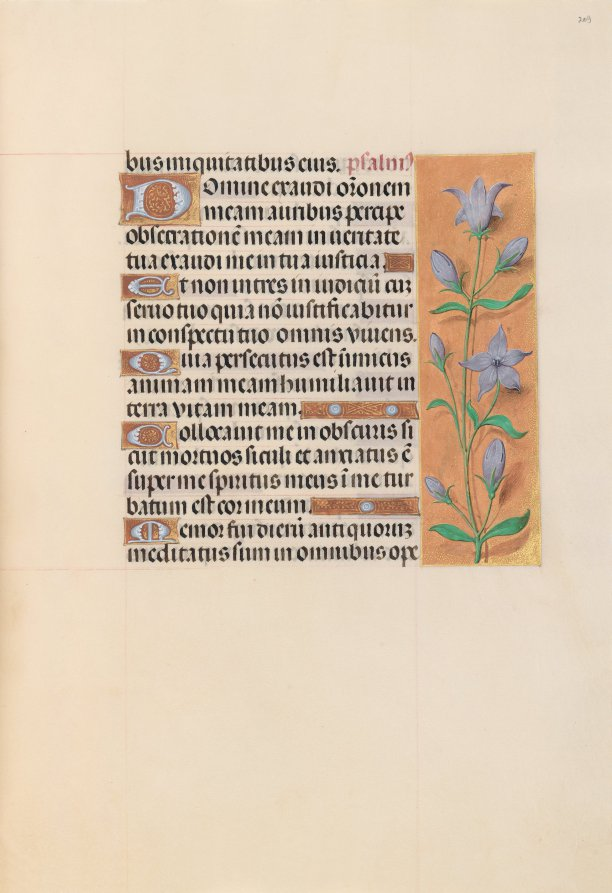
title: Hours of Queen Isabella the Catholic, Queen of Spain: Fol. 209r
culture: Flanders, Ghent and Bruges, late 15th century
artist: Master of the First Prayerbook of Maximillian (Flemish, c. 1444–1519)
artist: and Associates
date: c. 1500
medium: ink, tempera, and gold on vellum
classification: Bound Volume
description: This manuscript was illuminated by a circle of at least five highly organized manuscript painters active in the Flemish cities of Ghent and Bruges. The principal illuminator was Alexander Bening, who painted the majority of the book's miniatures. Manuscripts produced by this circle of artists are renowned for the decoration of their borders, which typically feature a rich variety of realistically-painted flowers, birds, and butterflies. This prayer book, called a book of hours, was intended not for a cleric, but for the private devotions of a lay person-in this case, Isabella the Catholic, Queen of Spain (1451-1504). Isabella's coat of arms embellishes the book's frontispiece. It is unlikely that the book was commissioned by the Queen herself; rather, she probably received it as a diplomatic gift from someone courting her patronage, perhaps Cardinal Francisco Jimenez de Cisneros. A Franciscan friar, Jimenez was dependent upon Isabella for his advancement, first to the post of Queen's confessor in 1492, and then to Archbishop of Toledo in 1495.